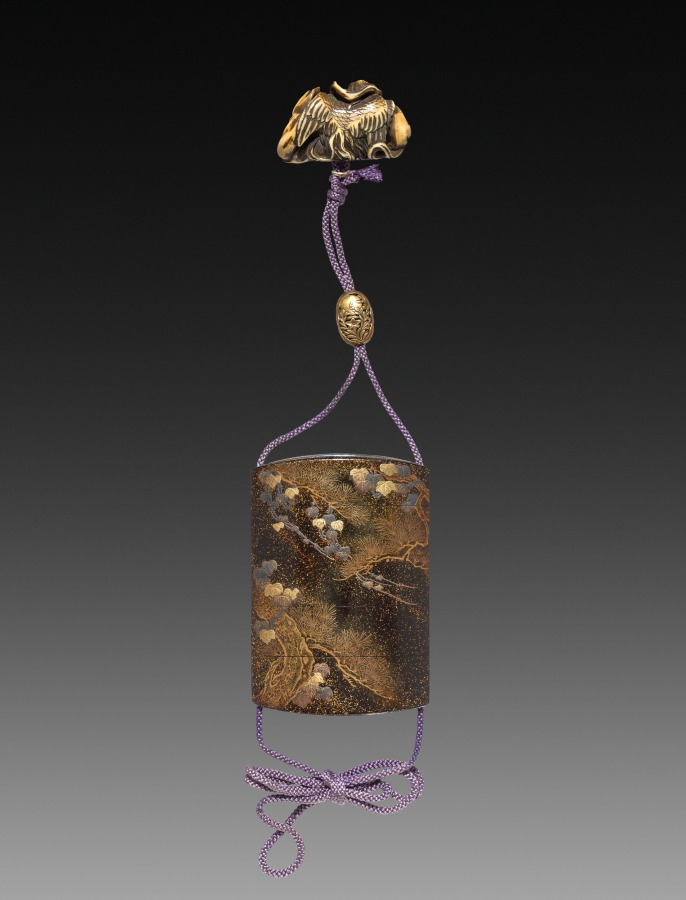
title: Inro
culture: Japan, Edo period (1615–1868)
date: 1615–1868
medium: lacquer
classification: Lacquer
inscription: Signature: Koma Kyuhaku